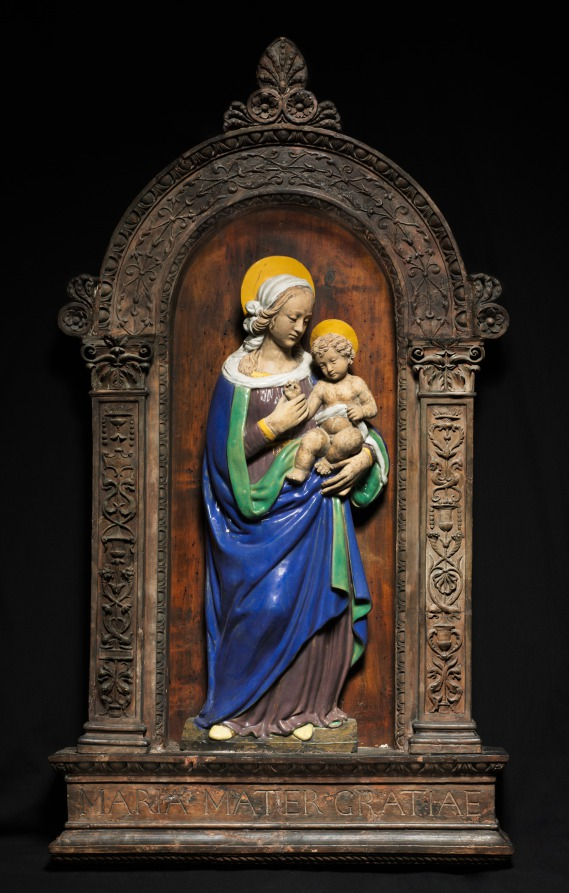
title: Virgin and Child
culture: Italy, late 15th-early 16th Century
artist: Benedetto Buglioni (Italian, 1461–1521)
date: 1500–1510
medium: glazed terracotta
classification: Sculpture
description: This small devotional object differs stylistically from Buglioni's Madonna and Child Enthroned with Saints Francis and Anthony Abbot (1921.1180), also in the museum's collection. In contrast to the other work, the faces of the Madonna and Child are significantly less expressive, and the passages of exposed skin have been left unglazed. The Madonna holds a nude Christ on her left arm and wears a mantle of blue with green lining and a maroon tunic with a yellow collar and cuffs. Her bright yellow shoes and the purple of her tunic are characteristic of Buglioni's color scheme and can also be seen in the other work. The tabernacle frame is probably contemporary to the figures, although it may not have been created specifically for this altarpiece. Buglioni likely worked in the studio of Andrea della Robbia, where he would have studied the family's techniques for glazing terracotta. The frame is classically inspired, with Corinthian capitals and Buglioni's characteristic egg and dart moldings. The facial type in this Madonna and Child recalls Buglioni's Madonna delle Grazie in Florence's Palazzo Frescobaldi, and because of this similarity, the scholar Allan Marquand attributed the Cleveland Madonna and Child to Buglioni in 1921, although this attribution has since been questioned.